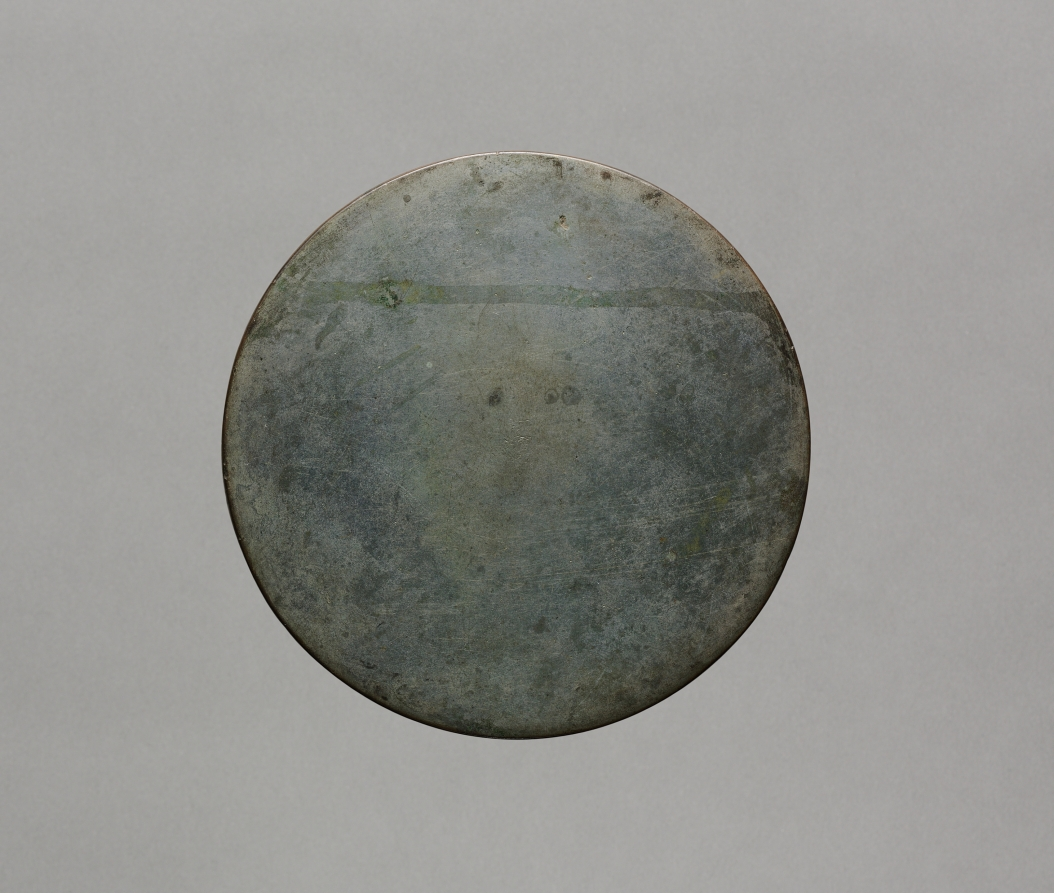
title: Mirror with Pair of Cranes in Chrysanthemum Pattern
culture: Japan, Muromachi period (1392–1573)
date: 1392–1573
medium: bronze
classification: Metalwork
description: The Japanese used chrysanthemums as decorative elements on mirrors. In the Heian period, a chrysanthemum with cranes or long-tailed birds was a common motif. Later, in the Kamakura and Muromachi periods, chrysanthemum designs were divided into three patterns with different symbolic associations: Chrysanthemum with Cranes represented longevity; Water Flowing suggested longevity as well as the Noh drama Kikujido, or Chrysanthemum Boy; and East Fence alluded to the poem "Drinking Wine" by Tao Yuanming (AD 365-427). Here, the mirror featuring Buddhist iconography (kyojo) and a chrysanthemum design on the back shows that the flower was also appreciated in the context of Buddhism in the Kamakura period.